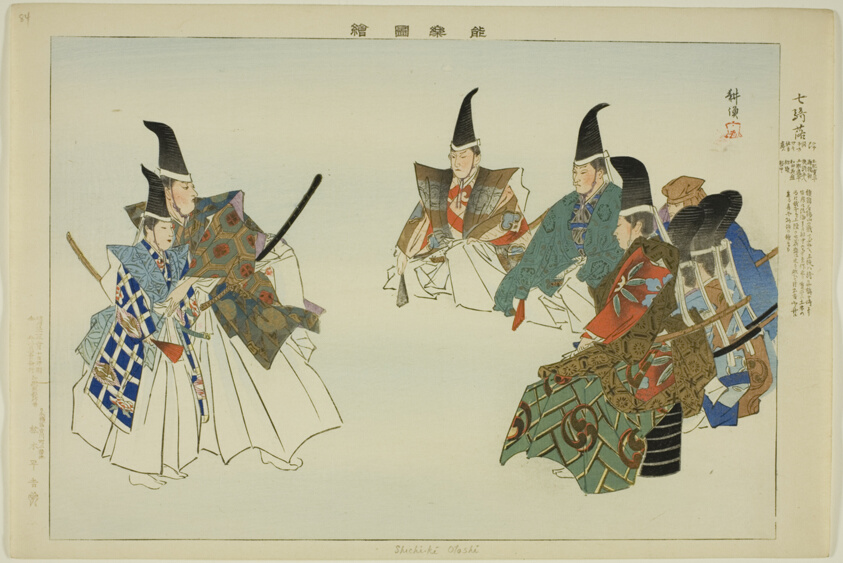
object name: Print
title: Shichi-ki-ochi, from the series "Pictures of No Performances (Nogaku Zue)"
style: Japanese (culture or style)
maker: Tsukioka Kogyo; Japanese, 1869-1927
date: 1898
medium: Color woodblock print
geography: Japan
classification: woodblock print; print; asian art